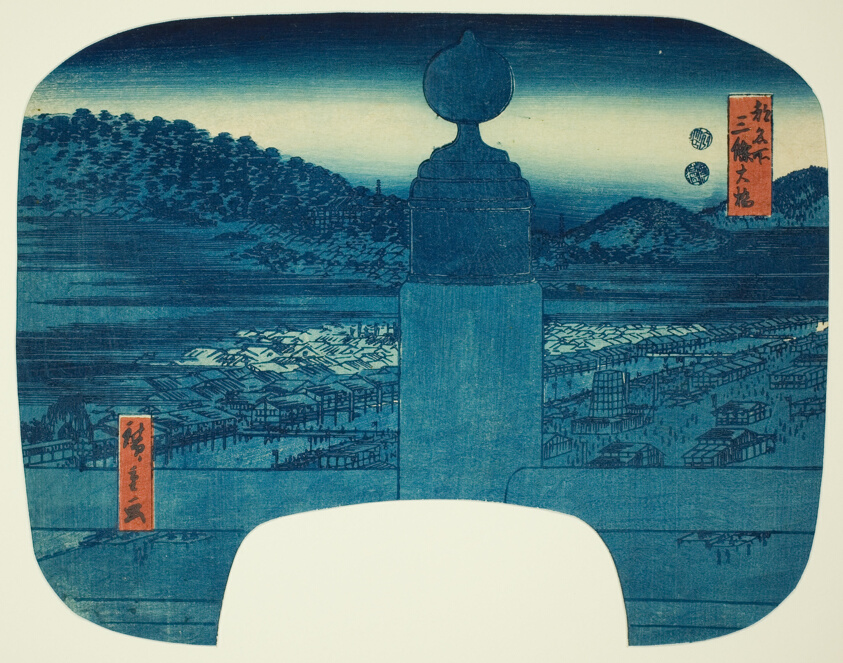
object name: Print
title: Sanjo Bridge (Sanjo Ohashi), from the series "Famous Places in Kyoto (Miyako meisho)"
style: Japanese (culture or style)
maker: Utagawa Hiroshige 歌川 広重; Japanese, 1797-1858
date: c. 1849/50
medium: Color woodblock print; uchiwa-e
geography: Japan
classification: woodblock print; print; asian art